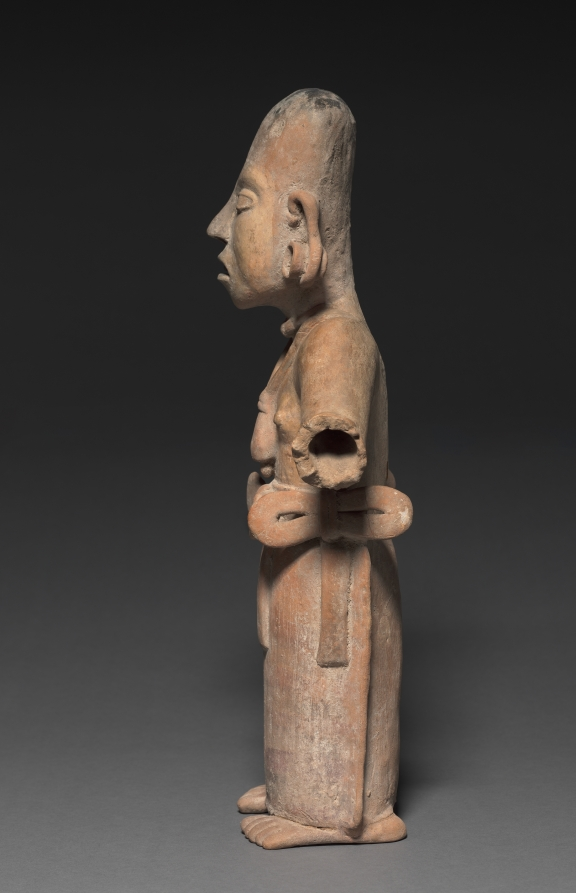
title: Female Figure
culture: Mexico, Southern Veracruz, Limon, Remojades Monumental Sculpture type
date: 200–500 CE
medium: pottery with burnished buff slip and asphalt paint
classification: Sculpture